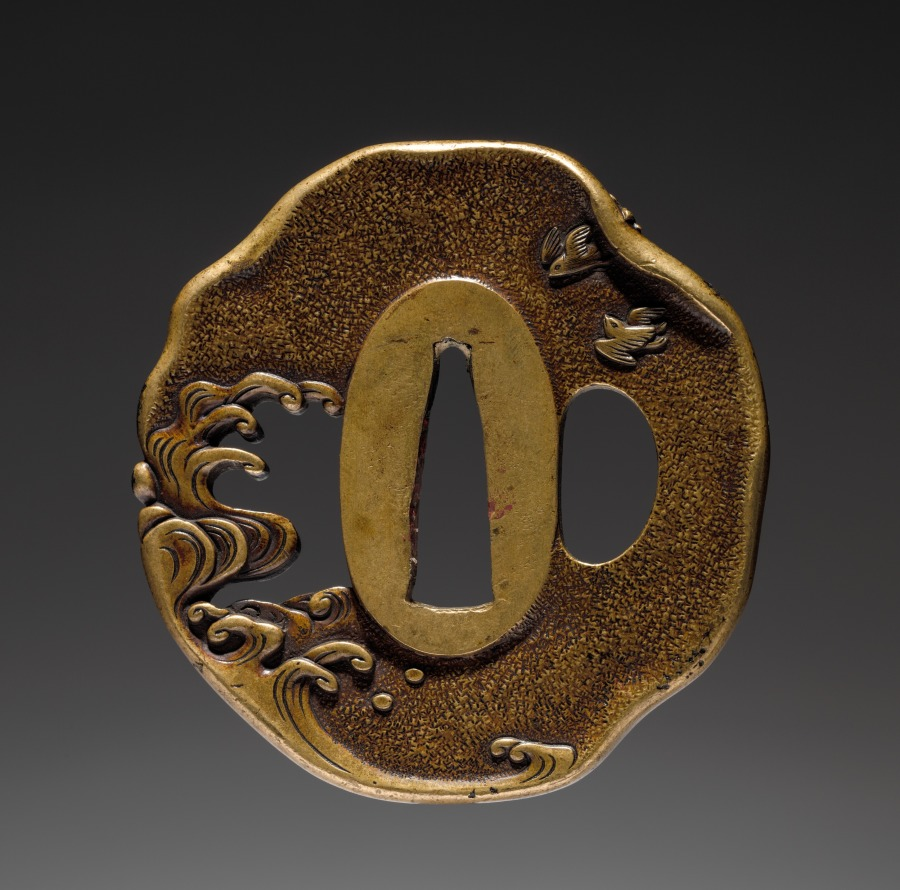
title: Sword Guard (Tsuba) with Plovers in Waves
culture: Japan, Edo period (1615–1868)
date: c. 1615–1868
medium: brass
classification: Arms and Armor